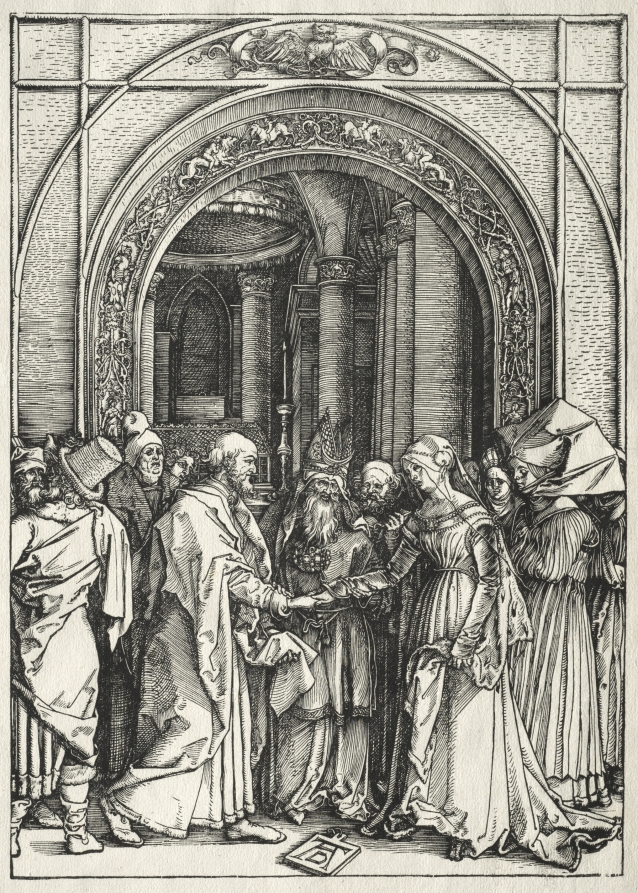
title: Life of the Virgin: Marriage of the Virgin and St. Joseph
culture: Germany, early 16th Century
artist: Albrecht Dürer (German, 1471–1528)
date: 1504–1505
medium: woodcut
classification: Print